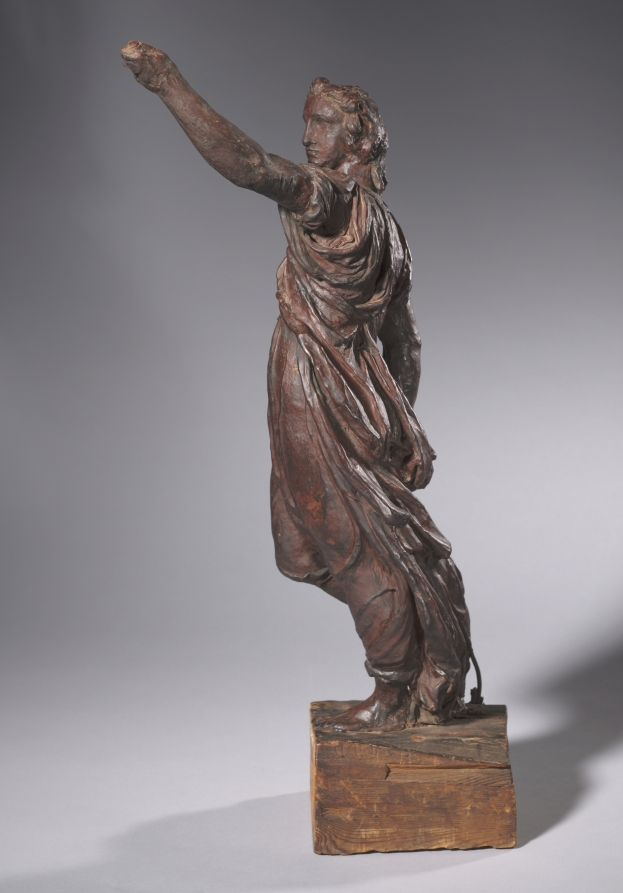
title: Model for an Angel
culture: Italy, Milan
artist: Annibale Fontana (Italian, 1540–1587)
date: c. 1583–84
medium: wax on a metal armature, mounted on wood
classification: Sculpture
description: Annibale Fontana created this wax model, perhaps in part for the patron’s approval, while preparing a sculpture for the Church of Santa Maria presso San Celso in Milan. The angel was mounted high on the facade, so the composition needed to be impeccably balanced as well as legible from the ground. Wings and a trumpet appear in the final work, but Fontana here concentrates on the deep folds, clinging drapery, and forceful pose.